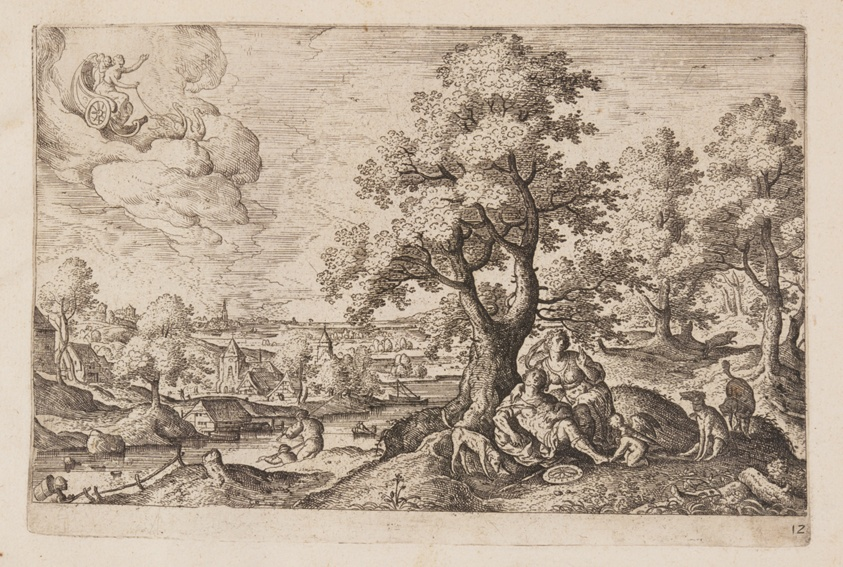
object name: Print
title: Plate 12, from Landscapes with Scenes from the Old and New Testament and Ovid’s Metamorphoses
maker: Hans Bol (Flemish, 1534–1593); published by Philip Galle (Flemish, 1537–1612)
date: 1574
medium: Etching on ivory laid paper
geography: Flanders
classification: print; paper; prints and drawing; etching